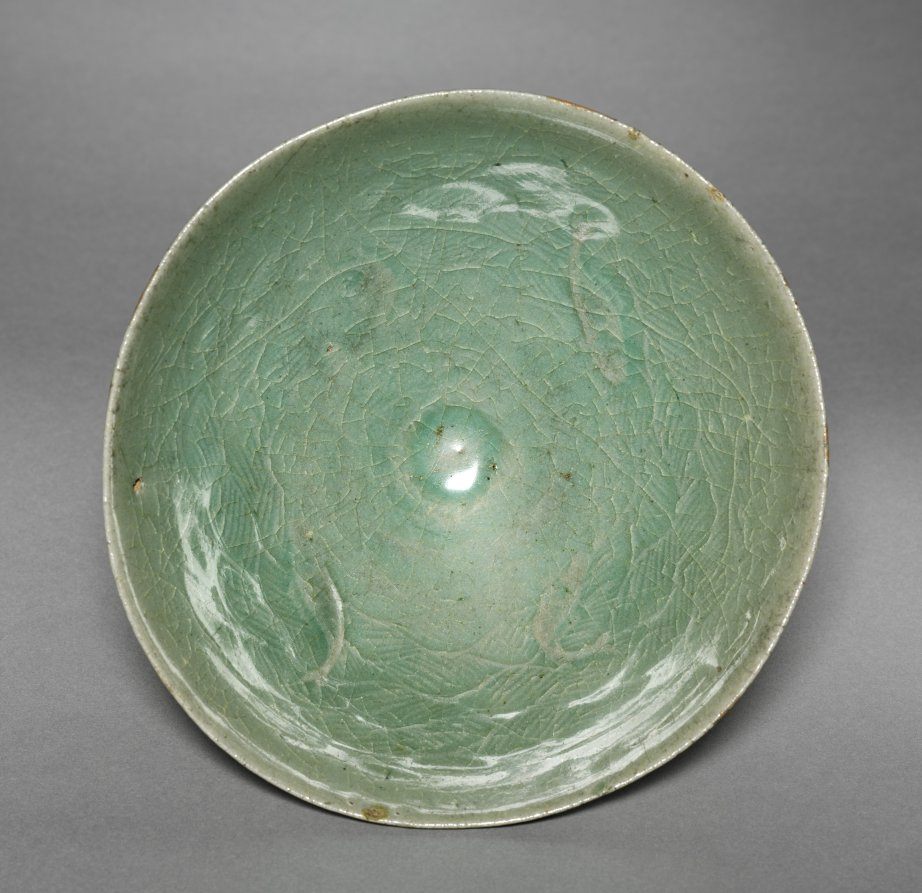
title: Bowl with Fish and Waves in Relief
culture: Korea, Goryeo dynasty (918–1392)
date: 1100s-1200s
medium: celadon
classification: Ceramic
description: As early as the seventh century, the practice of drinking tea and wine became an important part of elite leisure culture in Korea. A wide bowl like this example was especially suitable for drinking powdered tea shaved from a compressed tea cake, the most commonly enjoyed type during the Goryeo period. The image of fish swimming waves expressed in low relief on the inner wall of this tea bowl may have made the moment of drinking tea much enjoyable.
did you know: This tea bowl was part of the gifts donated by John L. Severance (1863–1936). He and his father Louis H. Severance (1838–1913) collected Korean ceramics of the Goryeo dynasty (918–1392) from a number of pioneering medical missionaries as a way to foster their activities in Korea, and later donated them to the Cleveland Museum of Art.